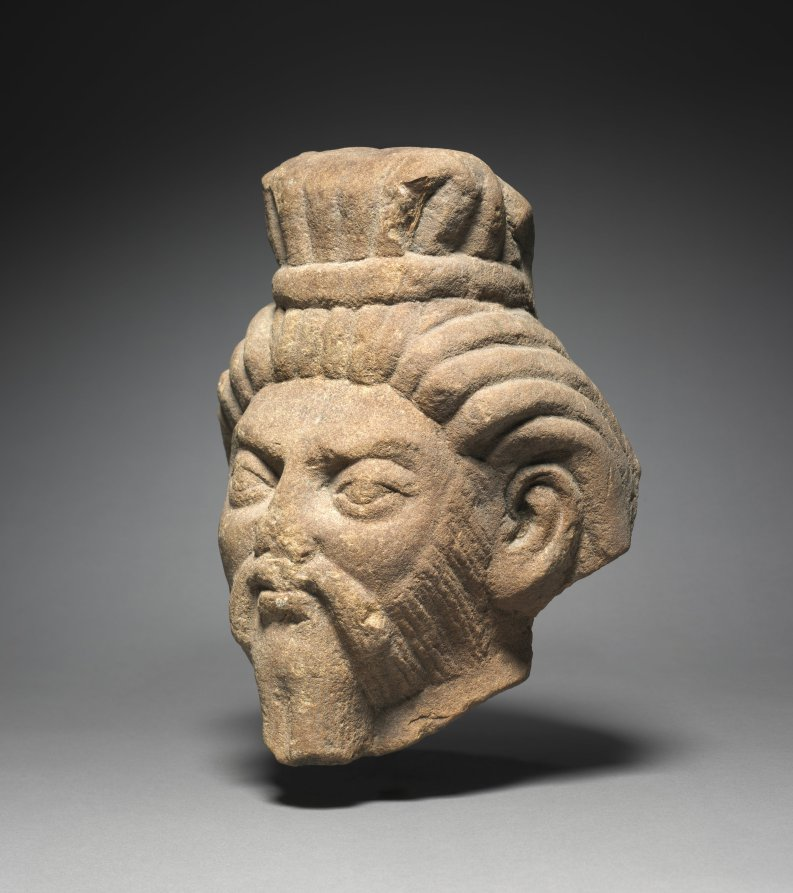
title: Head of a Rishi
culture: Northern India, Mathura, Kushan period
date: c. 125–150 CE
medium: stone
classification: Sculpture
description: The beard and thick dreadlocks identify this image as that of a rishi, a wise sage and Brahmin priest of Hinduism. Few examples of rishis survive in the round from this period.